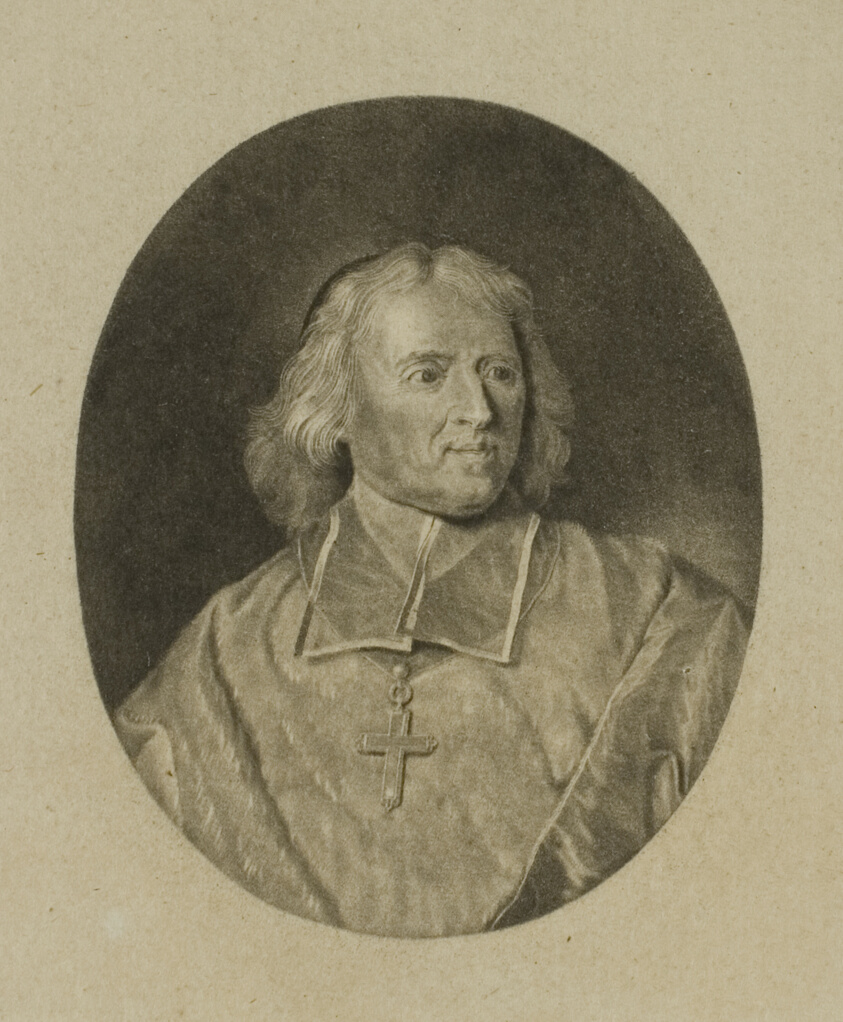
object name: Print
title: J-B. Bossuet: Bust Portrait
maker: Jean-Baptiste de Grateloup (French, 1735-1817)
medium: Aquatint on paper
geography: France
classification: aquatint; print; prints and drawing